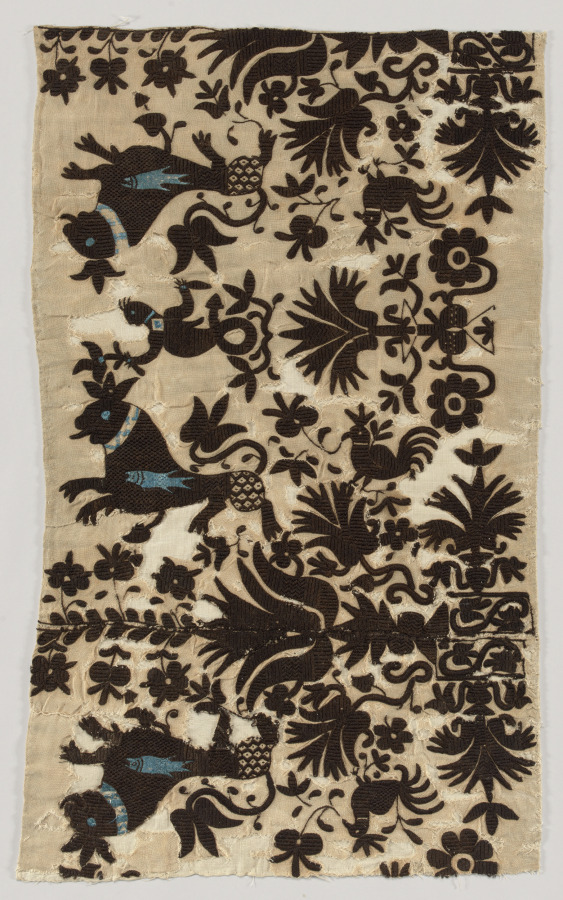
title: Embroidery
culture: Spain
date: 1700s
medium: embroidery; wool and silk thread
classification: Embroidery